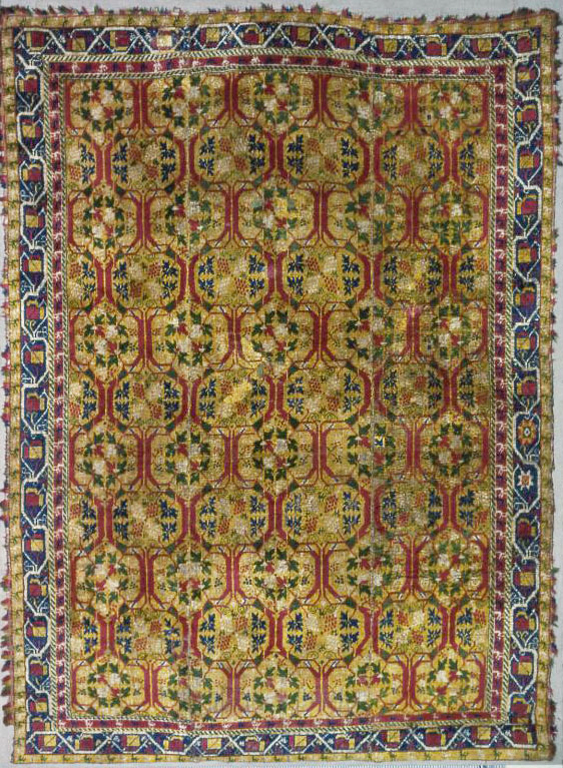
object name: Textile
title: Carpet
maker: Spain, Alpujarras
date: 18th century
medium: Silk, plain weave with supplementary patterning wefts forming uncut pile; selvage edge of plain weave terminating in weft fringe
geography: Spain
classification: textile; weaving - carpet; weaving